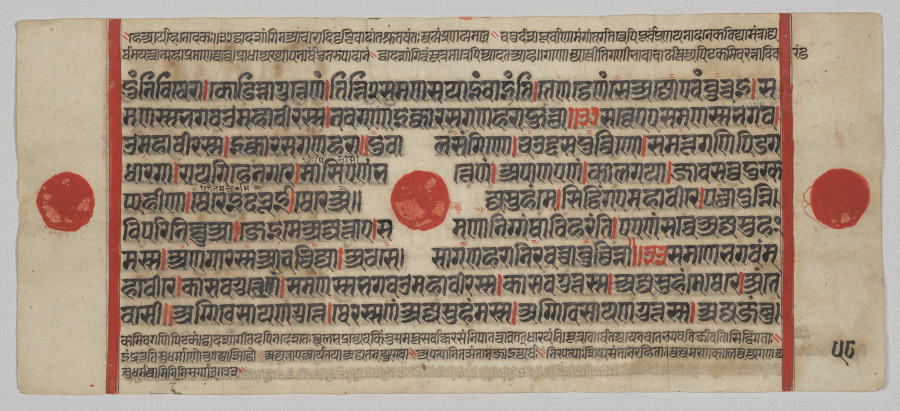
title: Text, Folio 58 (verso), from a Kalpa-sutra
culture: Western India, Gujarat, last quarter of the 15th century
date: c. 1475–1500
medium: Gum tempera, ink, and gold on paper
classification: Painting